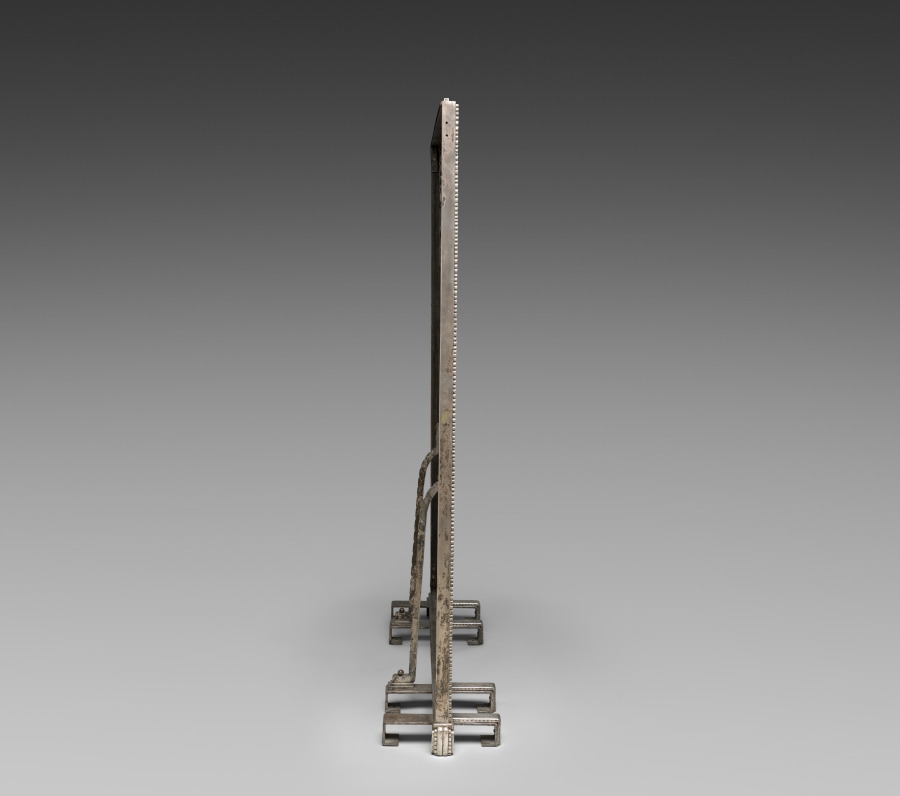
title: Muse with Violin Screen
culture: America, Ohio, Cleveland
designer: Paul Fehér (American, born Hungary, 1898–1990)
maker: Rose Iron Works (America, Ohio, Cleveland, est. 1904)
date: 1930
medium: Steel, brass; silver and gold plating, cotton velveteen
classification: Metalwork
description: Since the early years of the 20th century, the Rose Iron Works, a Cleveland supplier of architectural ornament, has produced distinguished metalwork. The company’s founder, Martin Rose, was born in Austria-Hungary and studied ornamental metalsmithing in Vienna prior to immigrating to Cleveland in 1902. In the 1920s, he hired a talented young Parisian designer, Paul Fehér, to work for the firm. Fehér’s designs, culminating in this massive screen, brought a modern European sensibility to the Rose Iron Works production. With its geometric patterning, highly stylized and abstracted natural forms, and the central figure reminiscent of the celebrated jazz singer Josephine Baker, this screen reflects the classic motifs of Art Deco design.